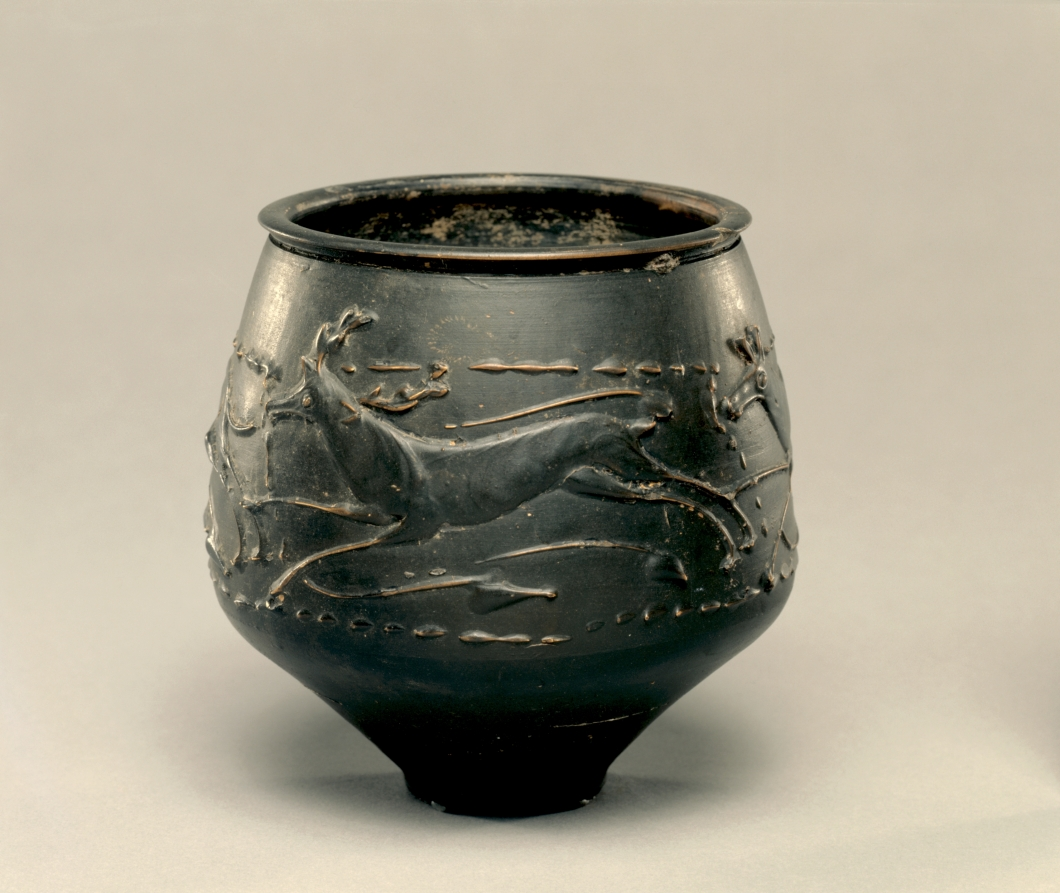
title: "Caster Ware" Vase with Hunt Scene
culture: Rhenish (Cologne), Gallo-Roman, mid-2nd Century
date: mid-100s CE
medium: reddish ware with black burnished slip and Barbotine decoration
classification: Ceramic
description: The wide body of this vase is decorated with a hunting scene in which a stag, doe, hare, and hound chase each other around the vessel. Dotted lines above and below the animals form a border around the scene, though the heads of the creatures occasionally poke above it. While larger barbotine decorations were usually mold made and applied to a leather-hard surface, the figures on our pot were piped on by hand.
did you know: “Hunt cups” like this one were a specialty of artisans working in Roman Cologne during the 2nd century CE.